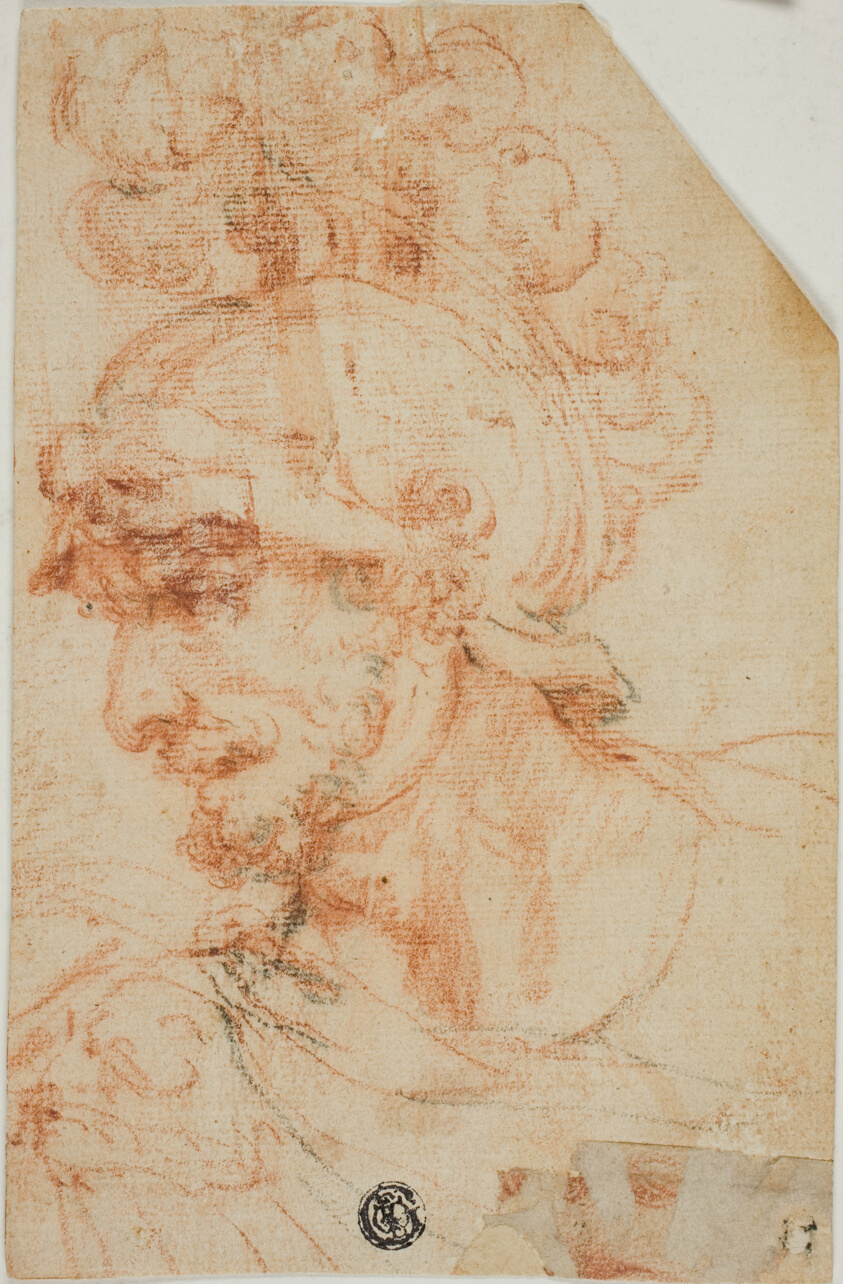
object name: Drawing and Watercolor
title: Bust of Helmeted Warrior in Profile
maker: possibly Giuseppe Cesari, called Il Cavalier d'Arpino (Italian, 1568-1640); possibly Style of Bernardino Poccetti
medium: Red chalk, with touches of black chalk, on cream laid paper, laid down on ivory laid paper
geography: Italy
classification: chalk; drawings (visual works); prints and drawing